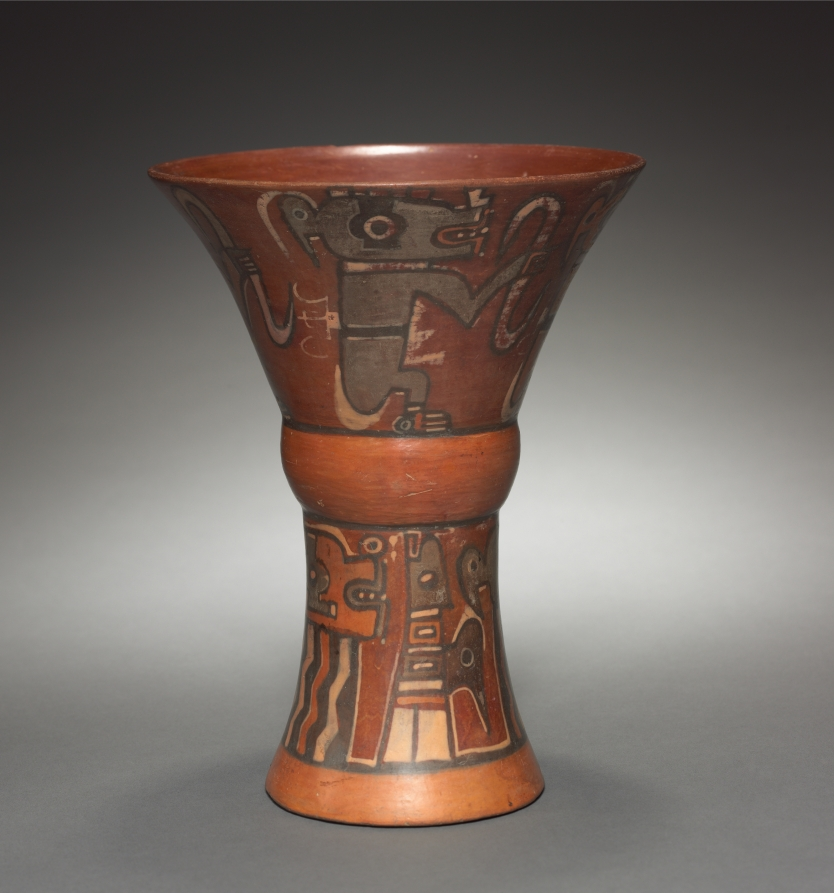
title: Kero (Waisted Cup)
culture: Bolivia, Cochabamba(?), Tiwanaku style, 400-1000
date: 400–1000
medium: earthenware with colored slips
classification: Ceramic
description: The kero is a distinctive Tiwanaku vessel form, imitated by the later Inka, who used the cups in political and religious ceremonies. It is assumed that the same was true at Tiwanaku, where impressive stone figures, perhaps rulers, hold keros as though they are emblems of authority. Perhaps, like the Inka, the Tiwanaku used keros to drink chicha, a corn beer shared to cement bonds of mutual obligation among allies.